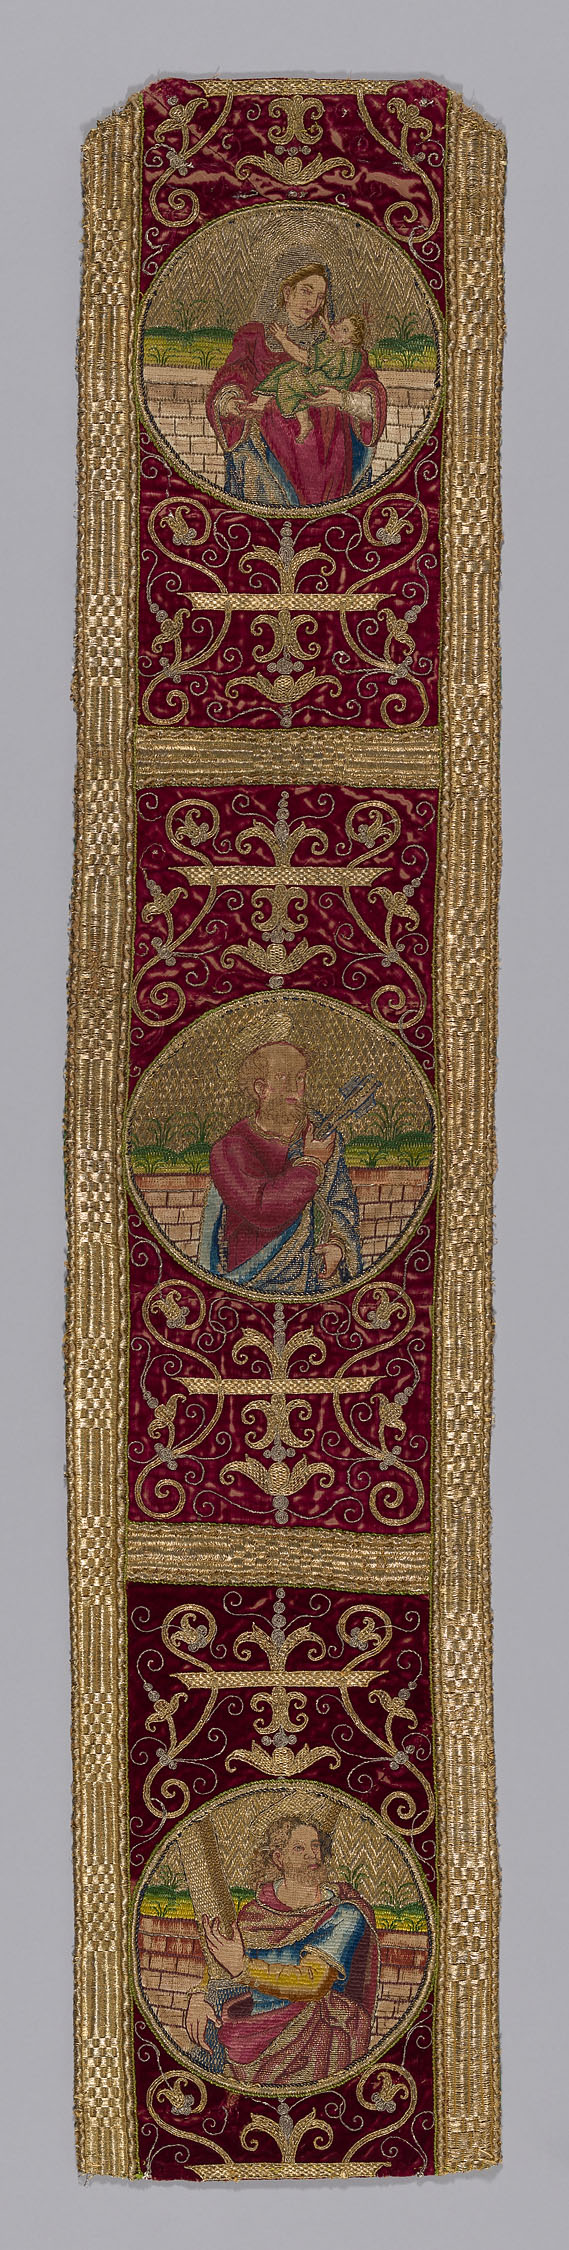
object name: Religious/Ritual Object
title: Orphrey Band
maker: Italy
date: 17th century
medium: Hemp and linen plain weave; appliquéd with silk, broken warp chevron twill weave cut, solid velvet; embroidered with silk and gilt- and silvered-metal-strip-wrapped silk in satin and split stitches; laidwork, couching padded couching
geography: Italy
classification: textile; weaving - velvet; liturgical; needlework (visual works); ritual objects